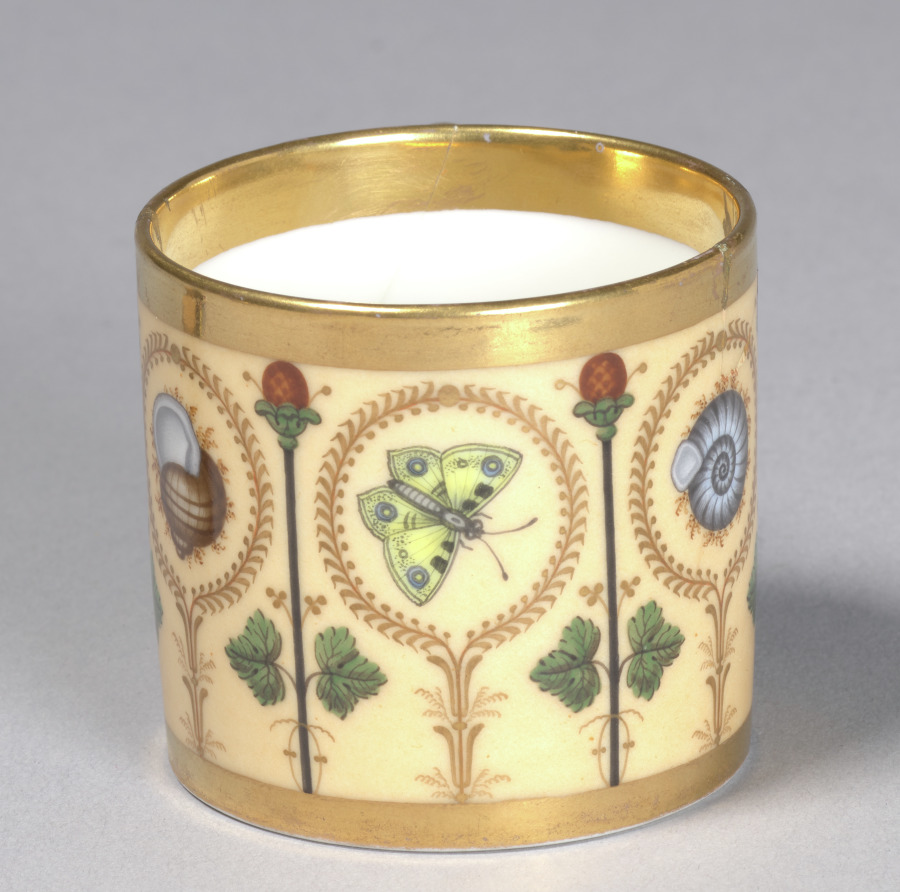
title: Cup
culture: France, 19th century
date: c. 1800–1810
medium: porcelain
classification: Ceramic